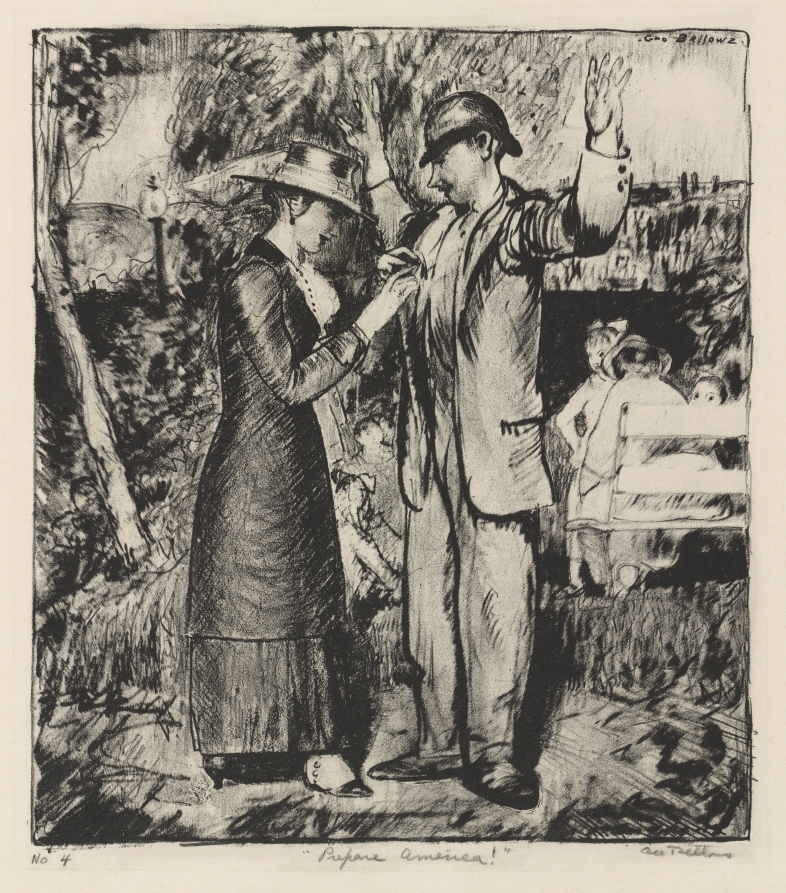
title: "Prepare, America!"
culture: America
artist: George Bellows (American, 1882–1925)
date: 1916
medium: lithograph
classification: Print